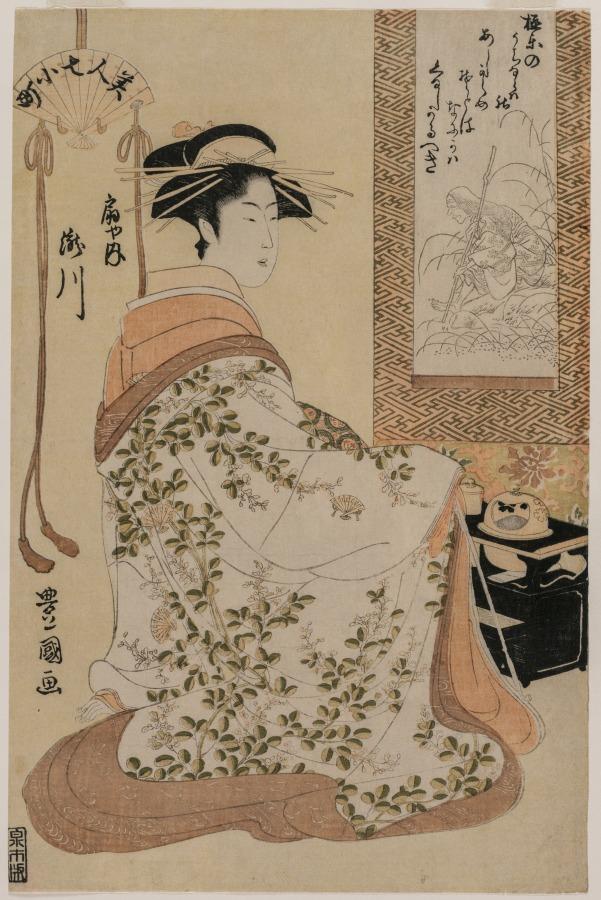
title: Takigawa of Ōgiya, from the series Beauties as the Seven Komachi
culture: Japan, Edo period (1615–1868)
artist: Utagawa Toyokuni (Japanese, 1769–1825)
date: c. 1793–97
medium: Color woodblock print; ink and color on paper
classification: Print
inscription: Artist's signature: Toyokuni ga.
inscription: Publisher: Izumiya Ichibei (Senichi han). Censorship Seal: kiwame.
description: Seven plays based on legends from the life of 9th-century poet Ono no Komachi served as the source for this print series. The entertainer Takigawa gazes at a hanging scroll depicting Komachi as she appears in a scene from the play The Gravestone.